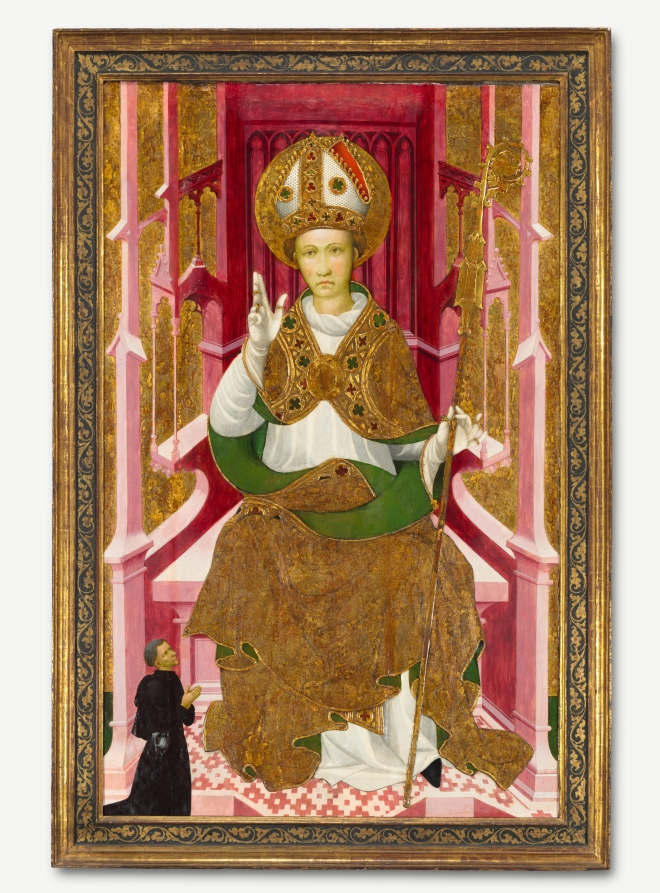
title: A Bishop Saint with a Donor (Saint Louis of Toulouse?)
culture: Spain, Catalonia, early 15th century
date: early 1400s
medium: tempera with raised and gilded gesso on wood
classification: Painting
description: The style of this painting suggests that it comes from Catalonia in northeastern Spain, though the identity of its artist remains unknown. The painting represents a youthful bishop-saint identifiable by a bishop’s symbols of authority, his miter and crozier. He wears rich vestments. Below, the figure in black represents the donor of the painting—likely a wealthy layperson rather than a cleric. The identity of the saintly bishop is speculated to be Saint Louis, Bishop of Toulouse, on the basis of his youth. Louis was consecrated Bishop of Toulouse in 1297, died six months later at the age of 23, and was canonized in 1317. His relics were moved in 1423 to Valencia and his cult flourished in Spain.